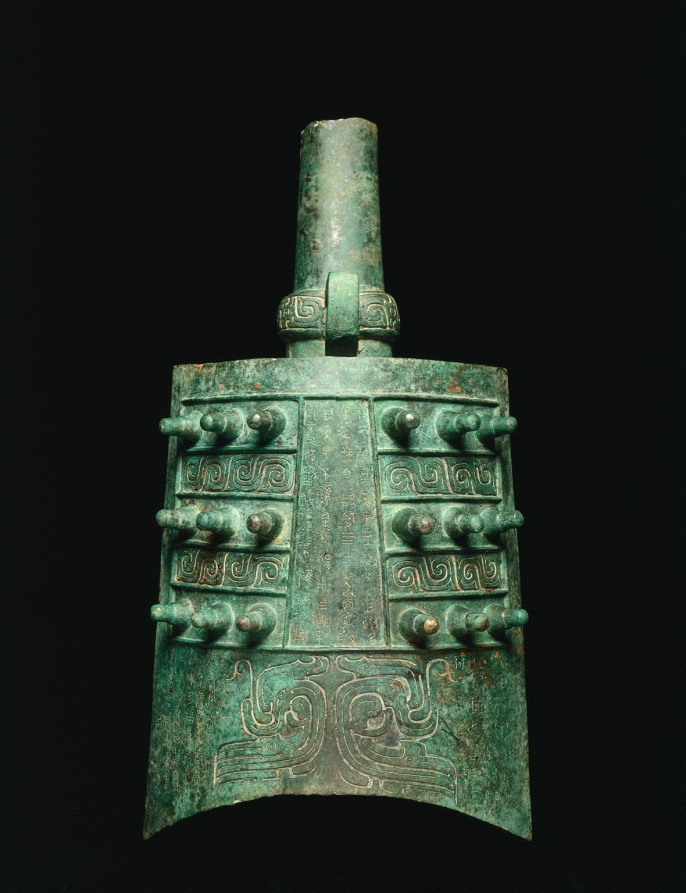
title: Bell (Lai Zhong)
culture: China, Shaanxi province, Meixian, Western Zhou dynasty (c. 1046–771 BCE)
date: c. 800–700 BCE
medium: bronze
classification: Metalwork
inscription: Lai proclaimed: "Great and illustrious was my august late father who made his heart clean following the disciplined virtue of his forefathers and dutifully served the past king. I, Lai, now succeed him in service and dare not fail. Respectfully, from dawn to dusk I will earnestly--even unto death--serve the Son of Heaven, taking as a model the obligation of my forefathers." I, Lai, was presented with many things. Then came the [king's] gracious command: "Manage the fisheries and forests of the realm." "I, Lai, dare to respond to the great, illustrious, sagely, and gracious favor of the Son of Heaven, extolling him and using this as cause to make for my august late father Gongshu a set of harmonized bells. Ding, dong, bing, bong, ding, dong, bing, bong. May they be used in acts of piety, reverently gladdening past luminaries. May the past luminaries who dwell on high help perpetuate this command, sending down upon me good fortune, tranquility, and purity. May I, Lai, live long in service to the Son of Heaven." May sons' sons and grandsons' grandsons forever treasure these [bells].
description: In ancient China, music and ritual had political significance and were linked inseparably to the power of states. During the Zhou dynasty, bronze bells were made in sets of eight to sixty bells. This bell is the second largest from a set of eight. This bell bears an inscription of 118 characters about its owner, Lai, and why it was cast. Lai's ancestors dutifully served the Western Zhou royal court, and he was granted a hereditary position by the "Son of Heaven" (the ruler). To express filial piety, Lai commissioned a set of bells as an offering to his father, Gongshu, in the hope that they would be forever treasured by future generations. This important inscription also provides an early example of Chinese calligraphy highlighting the purely abstract lines and construction of characters.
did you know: The technical sophistication of the unusual lens-shaped cavity allowed the bell to produce two different tones.